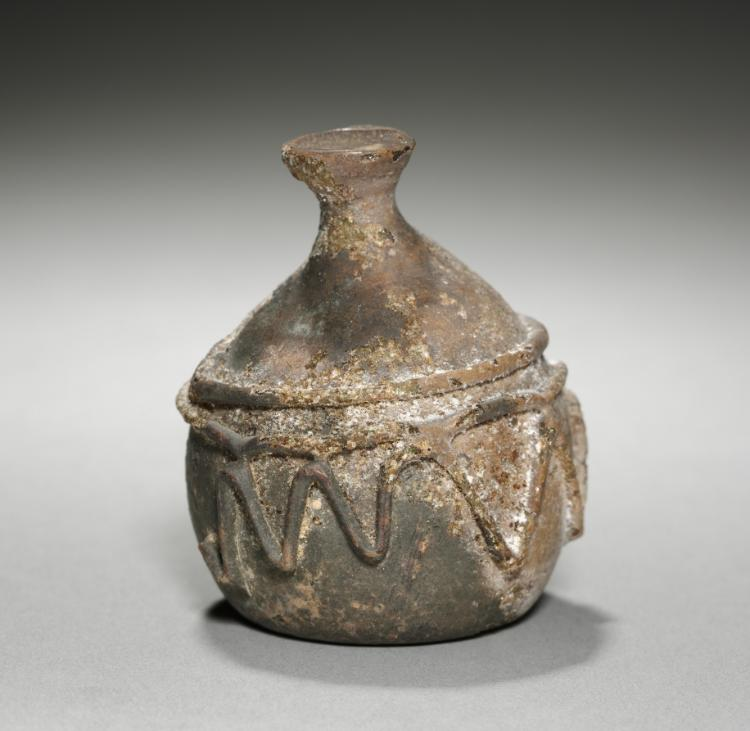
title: Vase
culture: Eastern Mediterranean, Roman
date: c. 200–500 CE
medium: glass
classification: Glass